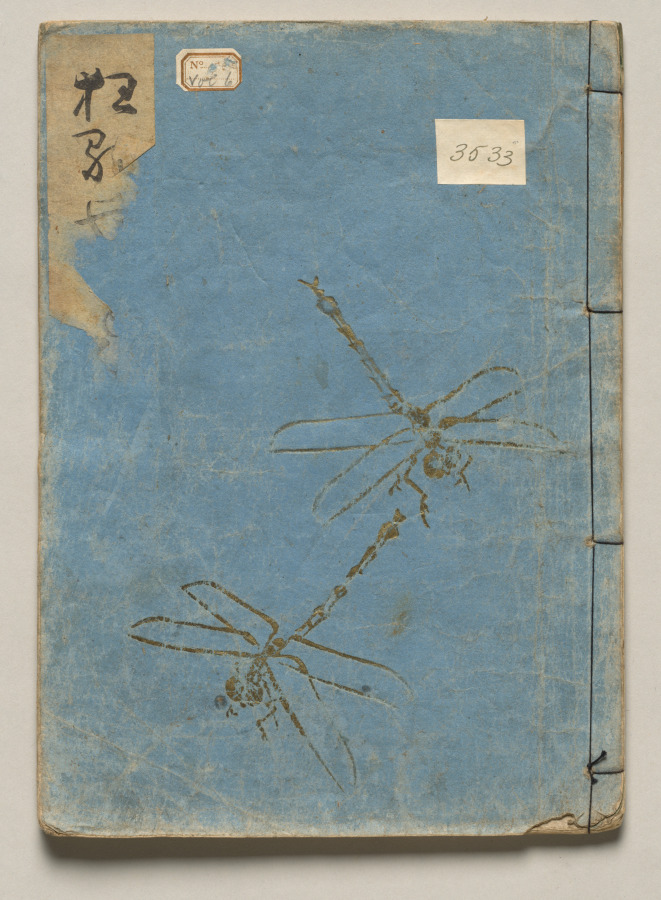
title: Volume Six of People of Japan in Light Verse (Kyōka)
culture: Japan, Edo period (1615–1868)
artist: Utagawa Hiroshige (Japanese, 1797–1858)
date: 1857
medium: Woodblock-printed book; ink and color on paper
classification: Bound Volume